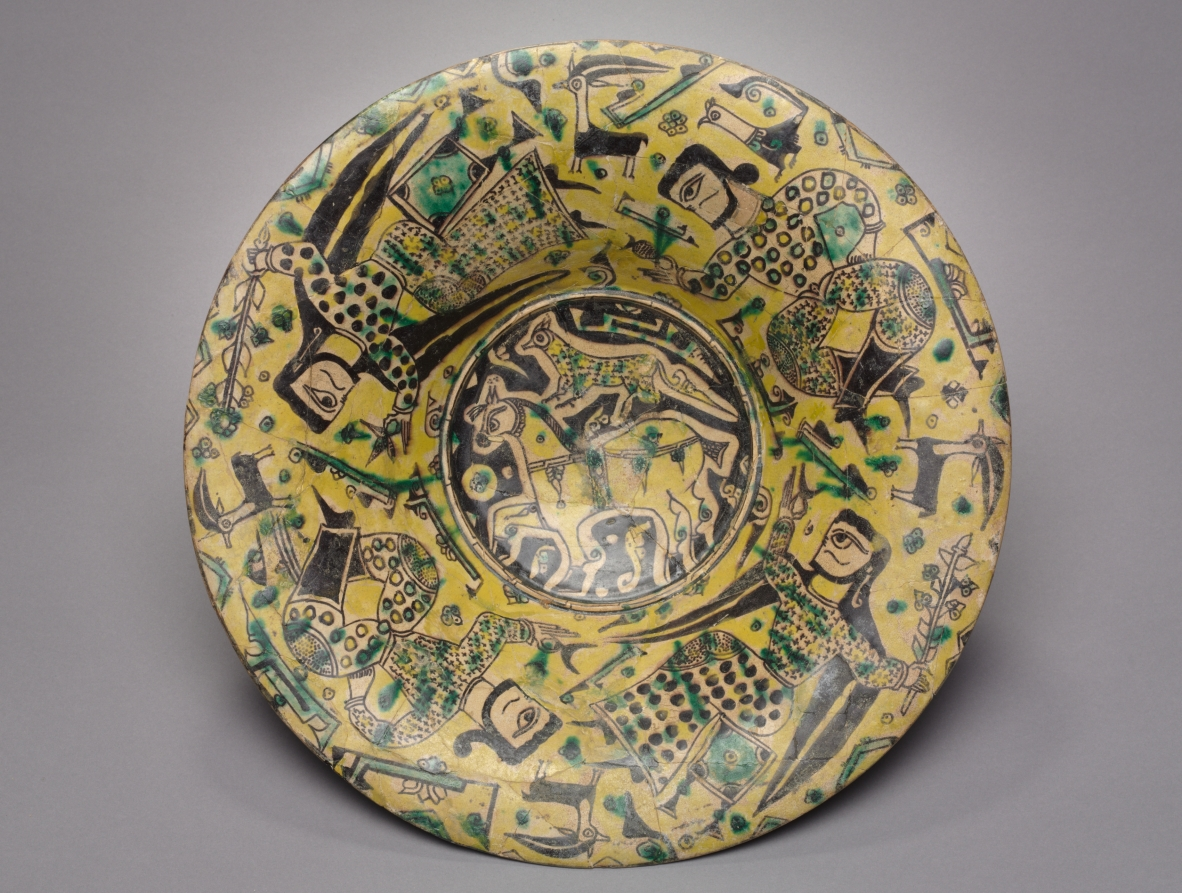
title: Nishapur Figural Bowl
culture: Iran, Nishapur, Samanid period (819–1005)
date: 900s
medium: Earthenware with underglaze decoration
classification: Ceramic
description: Nishapur was founded as a Sasanian imperial city and ceramics produced here regularly incorporate elements from Sasanian metalware. The lively decoration on this bowl features four bearded figures surrounded by animals, birds, and angular script (possibly extending baraka, blessing). The central horse with a cheetah on his back suggests an imperial hunt, a common theme in Sasanian and Islamic art. The decorative motifs and figures employed on Nishapur polychrome ware reflect the rich cultural traditions in this part of northeastern Iran. Some vessels, like this one, depict the pastime of hunting, others reflect festivals celebrated by Muslims and Zoroastrians, and a few display Christian symbols.